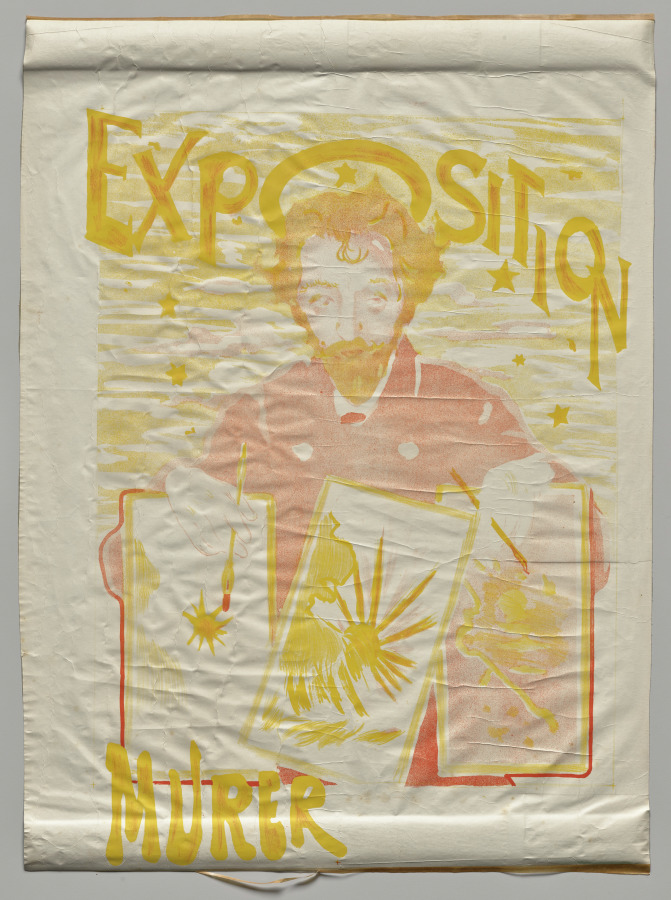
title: Trilogy of Months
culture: France, late 19th-early 20th century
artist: Eugène Murer (French, 1845–1906)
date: c. 1896–1906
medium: lithograph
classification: Print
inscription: lower left: Murer